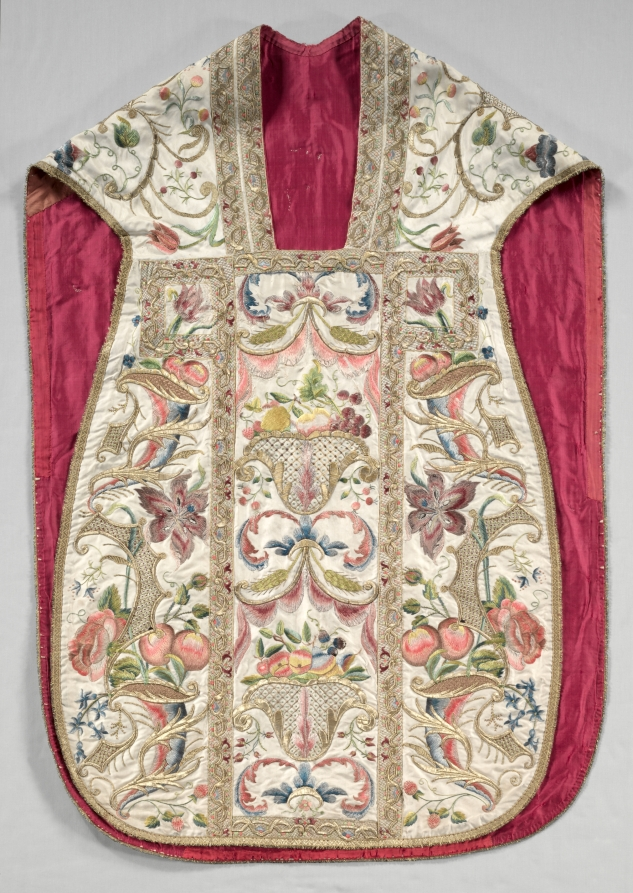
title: Chasuble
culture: Italy or Spain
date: 1700s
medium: Silk and metallic threads: embroidery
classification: Embroidery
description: The chasuble’s exquisite symmetrical decoration highlights its central panel where three illusionary gold containers hold skillfully shaded fruit in pastel silk tones. Delicately curving motifs enhance the side panels along with finely stitched strawberries in so-called French knots. This liturgical chasuble and other vestments, worn over a white alb with lace, were embroidered by professional specialists, such as experts who shaded colored silks or secured gold thread, in early versions of assembly lines that were usually in secular workrooms or in convents. The church or commissioner supplied the raw materials and paid a fee for the work.